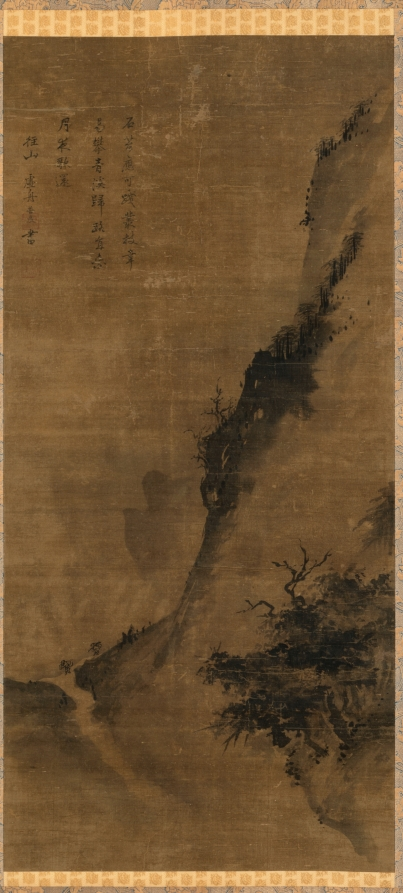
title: Landscape with Woodcutters Returning Home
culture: China, Southern Song dynasty (1127-1279)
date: 1200s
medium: hanging scroll, ink on silk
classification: Painting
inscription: inscribed by Xuzhou Pudu 虛舟普度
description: In late Song dynasty Chinese Chan Buddhist temples, paintings of landscapes, animals, or plants frequently took the place of deities. This hanging scroll features the humble life of woodcutters in nature an is in keeping with the Chan emphasis on simplicity and on the spiritual benefits of manual labor. executed in broad, quickly applied washes and punctuated by dark dots and texture strokes, the work is inscribed by Xuzhou Pudu, a priest at Wanshou temple near the Southern Song capital at Lin'an (modern Hangzhou).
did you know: A landscape with identical measurements in a Japanese private collection is also inscribed by Xuzhou. They may have been a pair of flanking scrolls in a triptych.